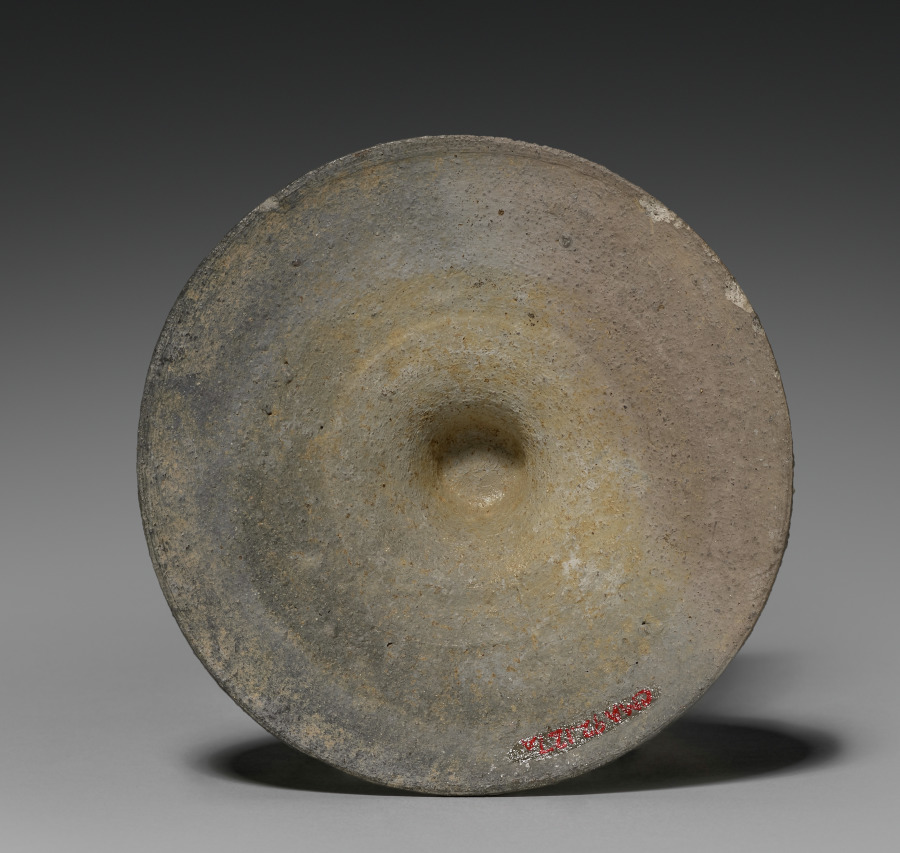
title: Pot with Cover (lid)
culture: Rhenish (Cologne), Gallo-Roman, 2nd century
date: 100–200 CE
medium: tan ware with gray and some brown burnished slip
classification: Ceramic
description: The work of Roman potters is very different from that of their Greek predecessors. Greek clay had allowed potters to throw thin-walled ceramics. Slips (paint) made from this clay had permitted painters to draw complicated scenes and figures with infinite care. As the Roman empire grew to include Germany and Britain, local clays found there were better for producing heavier pottery with three-dimensional decoration like this vase here. These jars—decorated with a human face (1992.125), animals (1992.126), a feather pattern (1992.183), a wheat pattern (1992.124), and vertical ribs (1992.127). were probably filled with foods or liquids and given either as gifts to an elaborate burial or as offerings to a god's shrine.